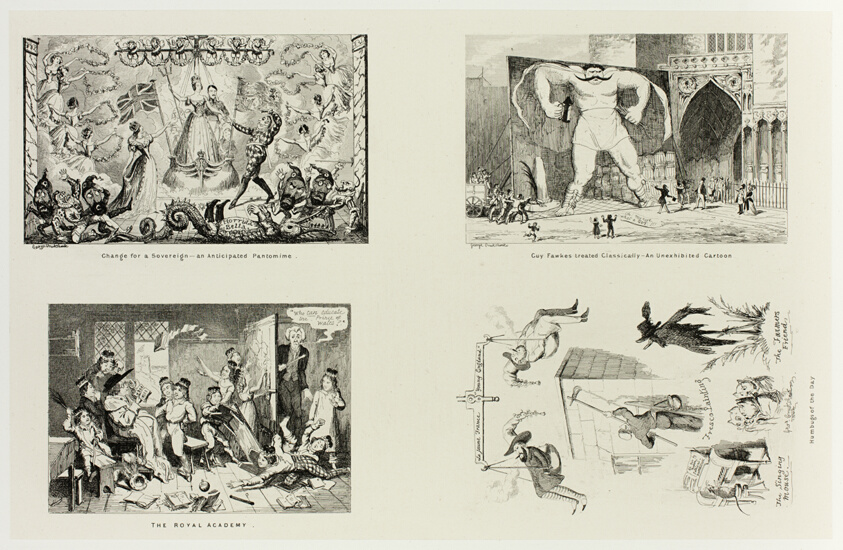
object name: Print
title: Change for a Sovereign - an Anticipated Pantomime from George Cruikshank's Steel Etchings to The Comic Almanacks: 1835-1853 (top left)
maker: George Cruikshank (English, 1792-1878); published by Pickering & Chatto (English, 19th century)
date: 1844, printed c. 1880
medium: Four steel etchings in black on cream India paper, laid down on off-white card (chine collé)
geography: England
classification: etching; paper; print; prints and drawing